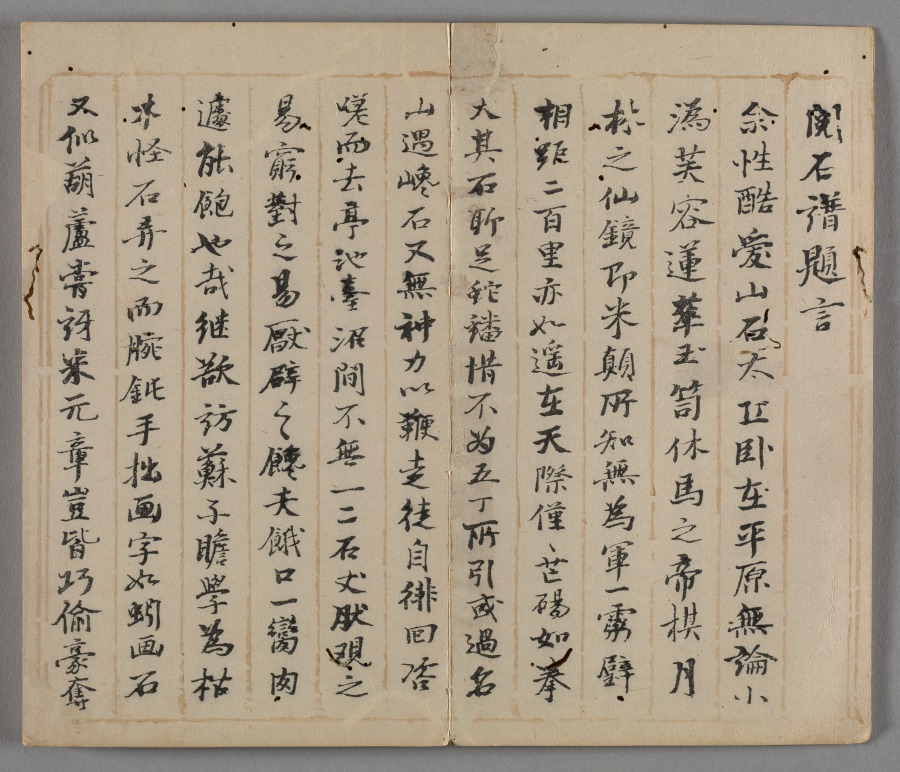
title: Ten Bamboo Studio Painting and Calligraphy Handbook (Shizhuzhai shuhua pu): Rocks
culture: China, Qing dynasty (1644-1911)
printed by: Hu Zhengyan (Chinese, c. 1584–1674)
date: 1633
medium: Woodblock-printed book; ink and colors on paper; first edition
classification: Print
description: Color printing reached a level of perfection in the early 1600s, as seen in this Ten Bamboo Studio Collection of Calligraphy and Painting and the Mustard Seed Garden Manual of Painting (printed 1679 and 1701). The painterly quality, precision in registering (aligning) the woodblocks, and harmonious colors made them the most successful color print editions in Chinese history. Both editions were printed and compiled in Nanjing, spread nationwide, and had a great impact on the arts in Japan and Korea.